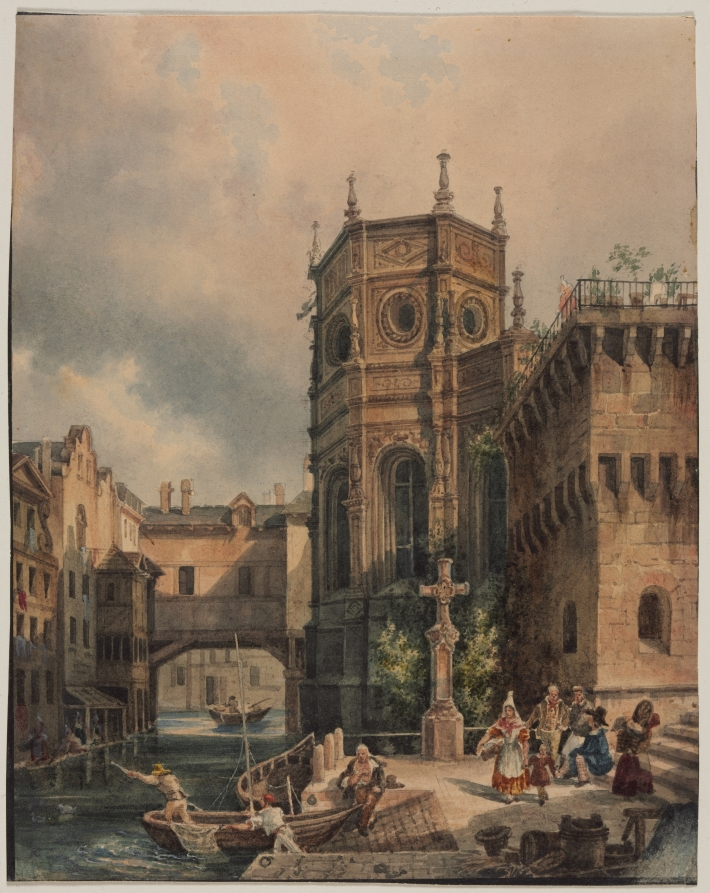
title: Scene on a Canal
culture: France, 19th century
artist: Hippolyte Jean Baptiste Garnerey (French, 1787–1858)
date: first half 1800s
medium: watercolor heightened with white gouache; framing lines in black [ink?]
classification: Drawing